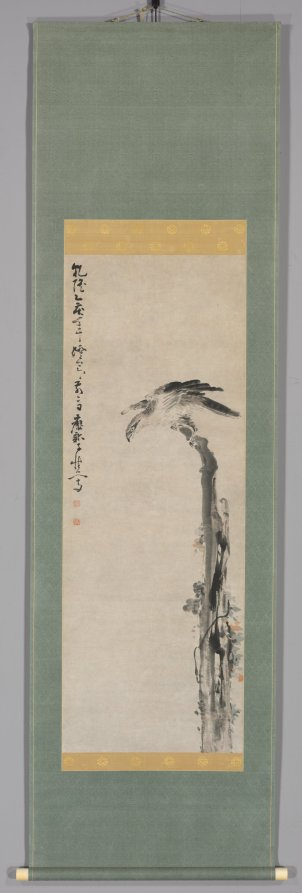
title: Eagle on a Tree Trunk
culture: China, Qing dynasty (1644–1911), Qianlong reign (1736–95)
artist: Huang Shen (Chinese, 1687–after 1768)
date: 1755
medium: Hanging scroll; ink and color on paper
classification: Painting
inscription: 乾隆乙亥年燈節前二日癭瓢子慎写。 [印]黃慎; 恭壽。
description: Huang Shen’s swift painting style is paralleled in his calligraphy. The vertical line in running script echoes the fluid form of the eagle on a tree trunk covered with a twisted vine. A native of Fujian province, Huang came to Yangzhou in 1724 to make his living as a painter. He needed years to develop a style that met the taste of his clients. He eventually became known as a figure painter and as one of the Eccentrics from Yangzhou, a group of local artists known for their unorthodox painting style.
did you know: With its wings partially lifted and sharp beak open in expectation, the eagle seems intent on some unseen prey below.